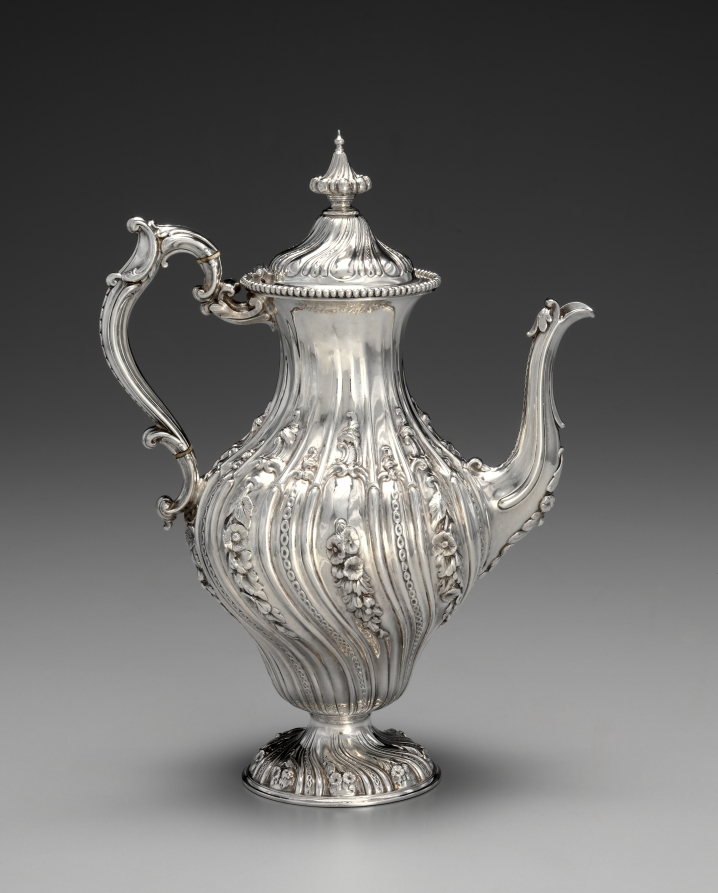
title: Neo-Rococo Coffee Pot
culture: England, 19th century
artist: Elkington & Co. (British)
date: c. 1850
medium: silver and ivory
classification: Silver